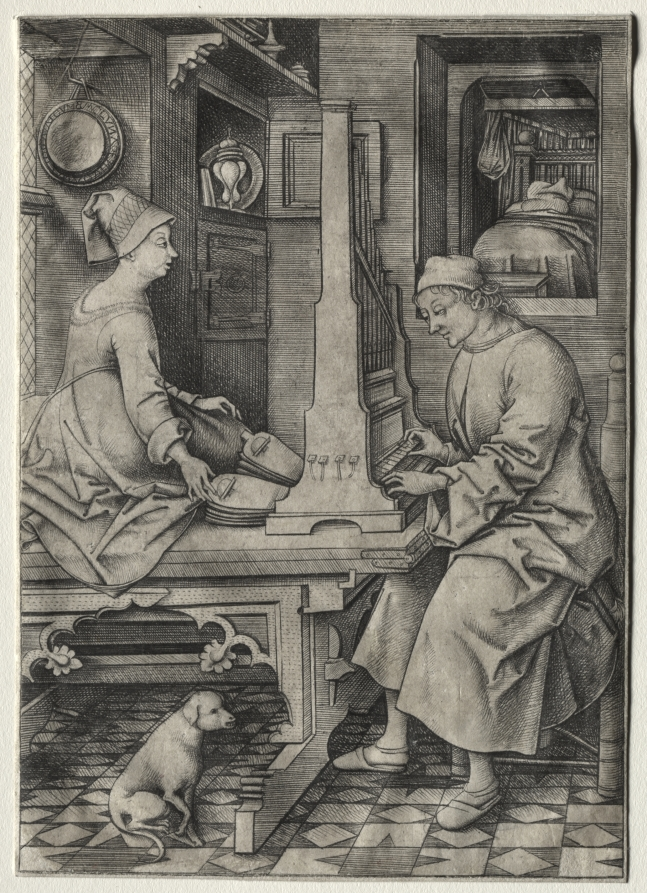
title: The Organ Player and His Wife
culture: Germany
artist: Israhel van Meckenem (German, c. 1440–1503)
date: c. 1495–1500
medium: engraving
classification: Print